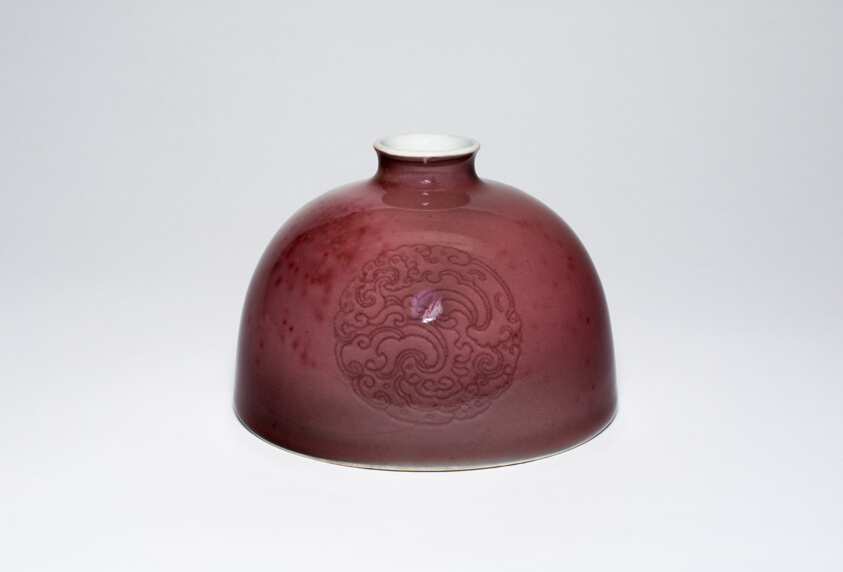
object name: Vessel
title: Beehive-Shaped Water Coupe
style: Chinese (culture or style)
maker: China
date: Qing dynasty (1644–1911), spurious Kangxi reign mark (1662–1722), 20th century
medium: Porcelain with copper red peachbloom glaze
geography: China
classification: ceramics; asian art; vessel